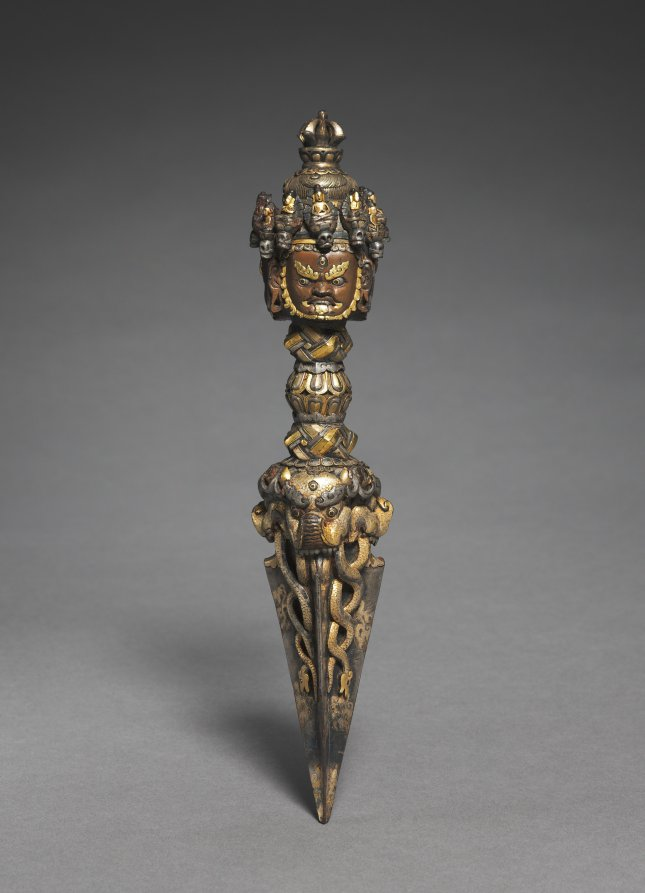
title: Phurbu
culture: Sino-Tibetan, Yongle period (1403–1424)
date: 1403–24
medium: metal alloys with gold and silver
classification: Metalwork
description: A purba is a dagger-like stake with three blades that helps tantric practitioners overcome their aversions to substances that are typically considered abhorrent, like pus and blood. Pierced with the purba, the unsavory substances are ritually transformed into wondrous substances, such as nectar. Crowning this purba are a half-vajra and three heads of the tantric enlightened being named Vajrakila, who presides over powers of transformation from wickedness to compassion. Each of his faces has been wrought of a different metal alloy in the imperial workshop of the Chinese emperor of the Ming dynasty. The luxurious quality of the endless knot motifs, the crocodile heads, and the snakes twisting down the center of each blade indicate Chinese imperial workmanship.